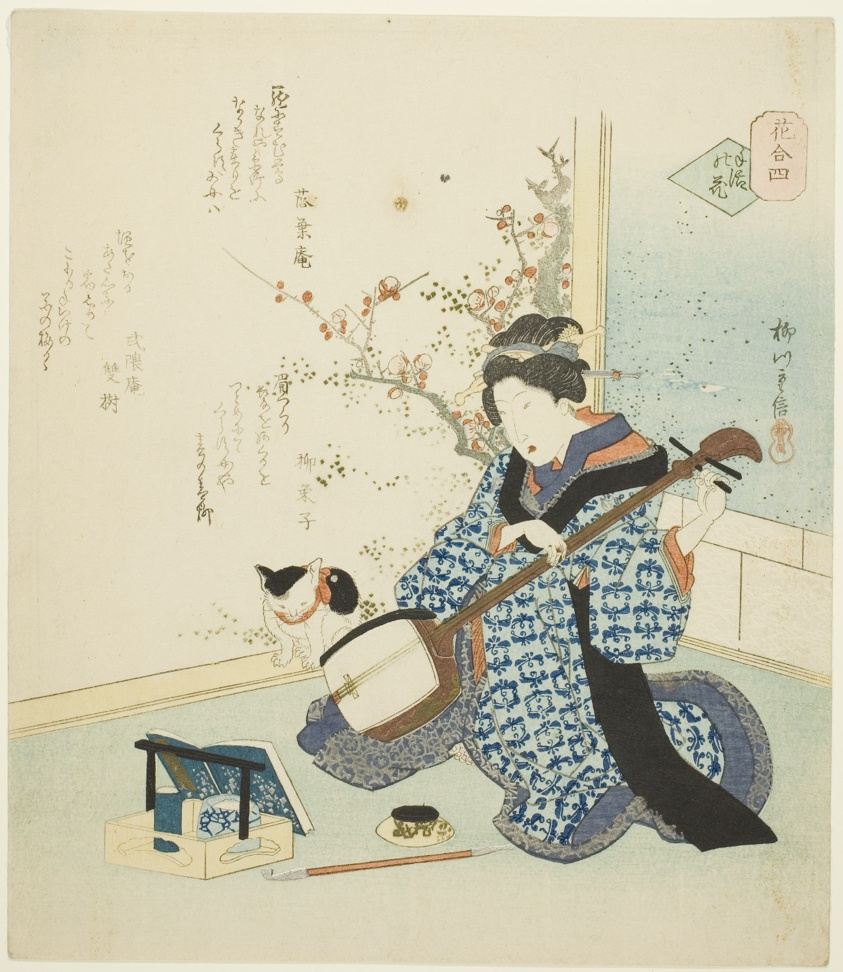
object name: Print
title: No. 4: Personally Arranged Flower (Teike no hana), from the series "A Comparison of Flowers (Hana awase)"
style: Japanese (culture or style)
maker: Yanagawa Shigenobu II (Japanese, active c. 1820-late 1850s)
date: late 1820s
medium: Color woodblock print; shikishiban, surimono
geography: Japan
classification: woodblock print; print; asian art